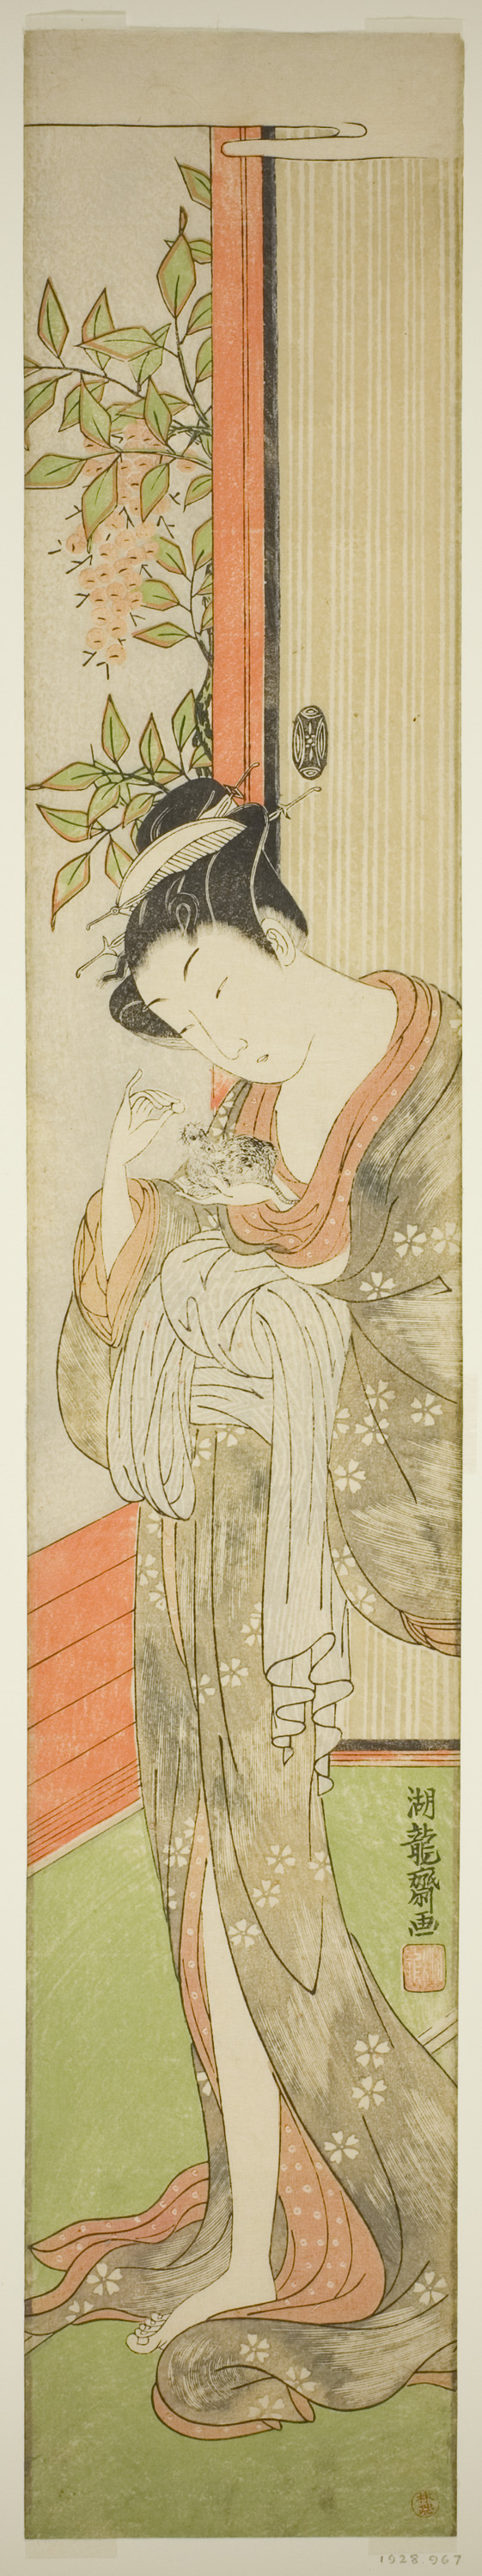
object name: Print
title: Young Woman Feeding a Rat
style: Japanese (culture or style)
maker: Isoda Koryusai (Japanese, 1735-1790)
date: c. 1771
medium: Color woodblock print; hashira-e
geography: Japan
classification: woodblock print; print; asian art